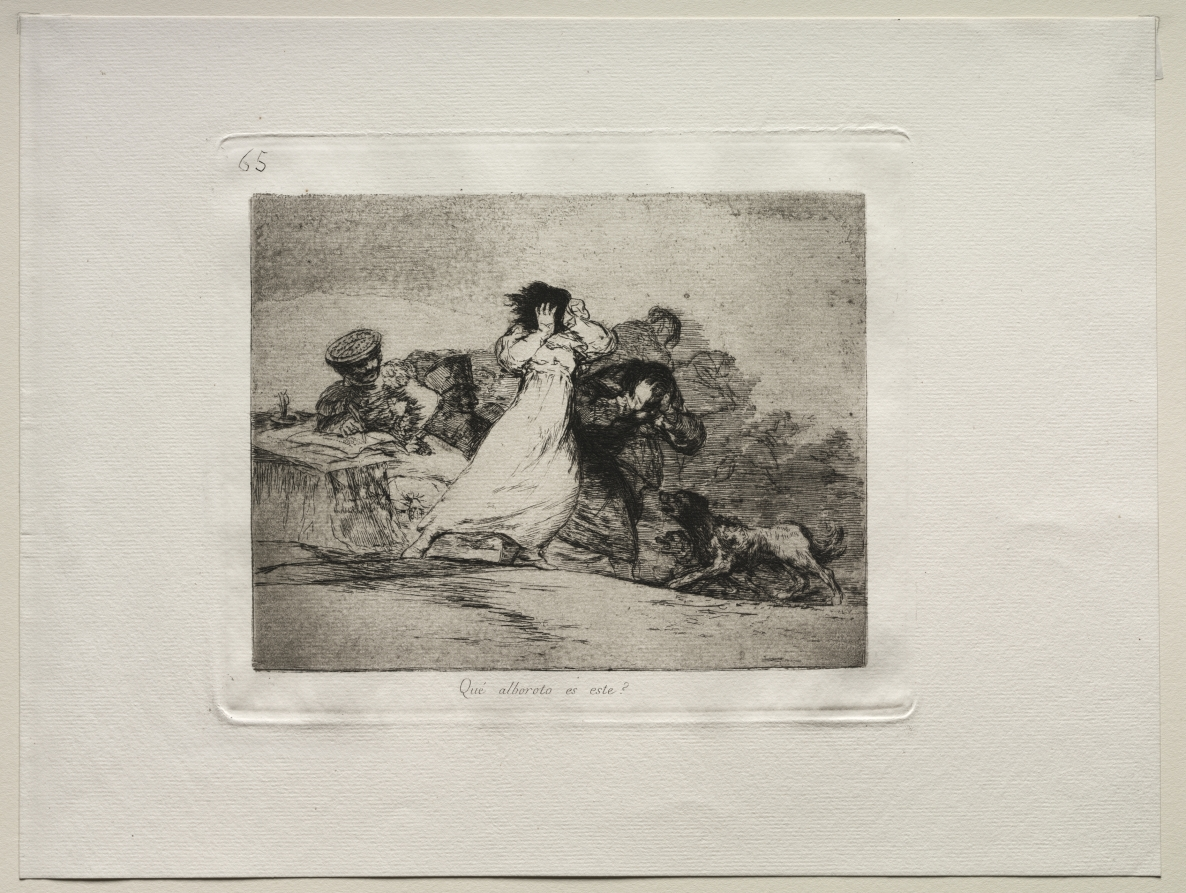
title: The Horrors of War: What is this Hubbub?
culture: Spain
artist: Francisco de Goya (Spanish, 1746–1828)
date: c. 1810–20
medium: etching and aquatint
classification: Print